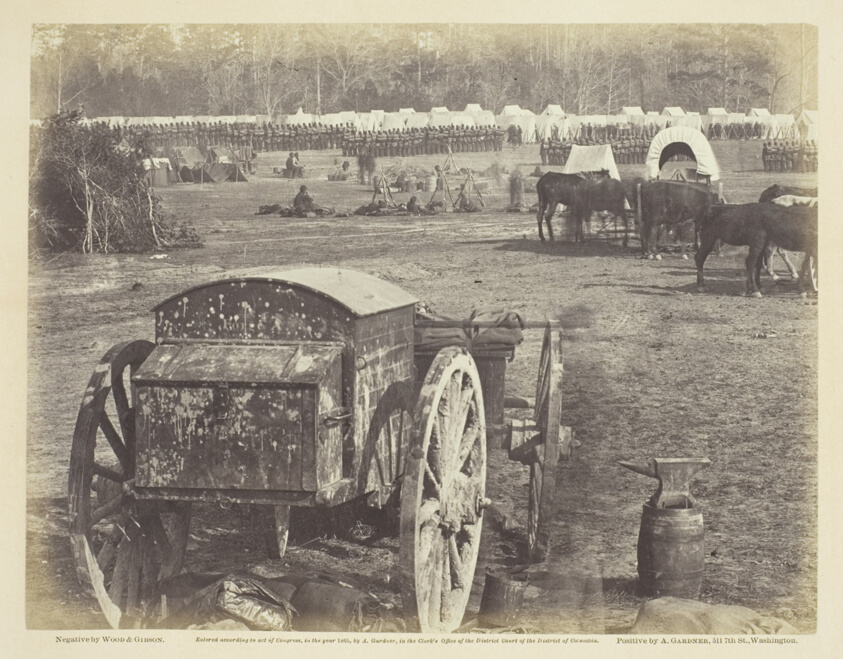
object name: Photograph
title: Inspection of Troops at Cumberland Landing, Pamunkey, Virginia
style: 19th century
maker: Wood and Gibson (American, active 19th century)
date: May 1862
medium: Albumen print, pl. 15 from the album "Gardner's Photographic Sketch Book of the War, vol. 1" (1866)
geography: United States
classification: albumen silver print; photographic process; photography; photograph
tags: Collected by Hugh Edwards, Gardner's Photographic Sketch Book